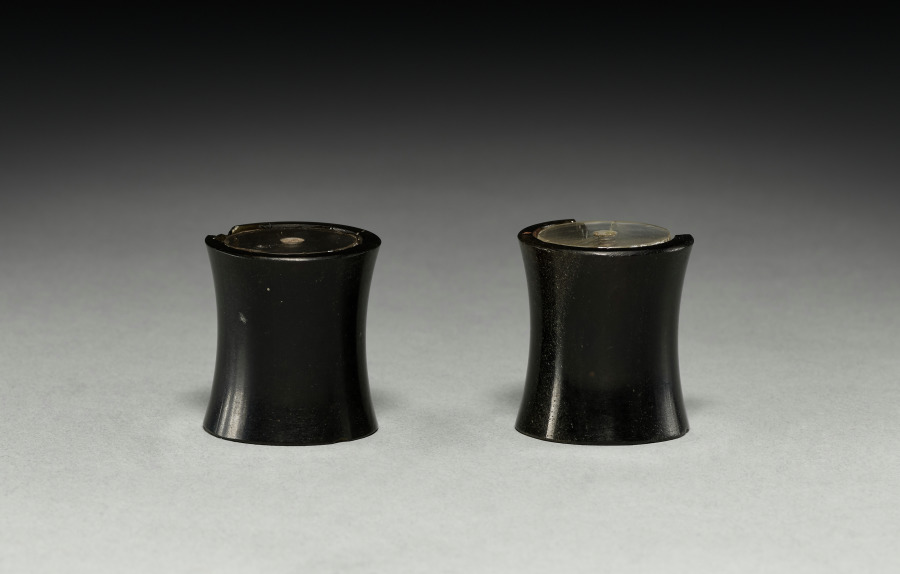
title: Pair of Ear Ornaments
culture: Mexico, Guerrero, Ichcatiopan, Mixtec or Aztec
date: c. 1200–1519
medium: obsidian, crystal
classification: Jewelry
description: This set of ear ornaments, each with a rock crystal insert, is said to have been found with a pendant made of jade and gold (1983.190). They may come from a buried offering or the tomb of an Aztec noble.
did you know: These obsidian ear ornaments look black but have a golden sheen.